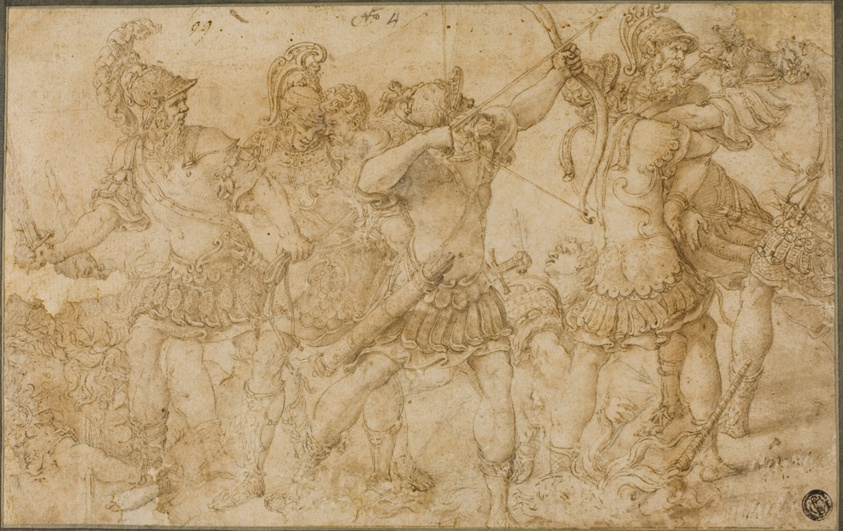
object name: Drawing and Watercolor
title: Fighting Warriors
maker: Unknown Artist; Italian, Mantuan, late 16th century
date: c. 1540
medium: Pen and brown ink with brush and brown wash, over traces of black chalk, on cream laid paper, laid down on ivory wove card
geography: Italy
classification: ink with wash; drawings (visual works); prints and drawing